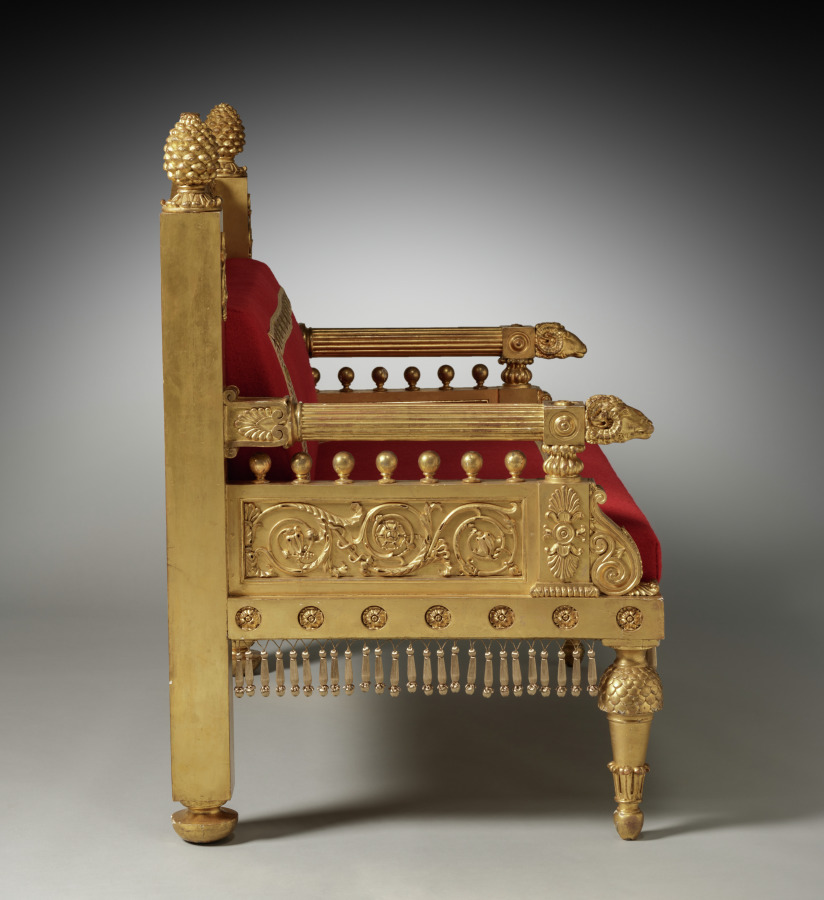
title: Settee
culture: England, 19th century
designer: Thomas Hope (British, 1769–1831)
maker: Unknown Maker (British)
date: c. 1802–07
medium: gilt-wood, reproduction wool upholstery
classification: Wood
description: An art collector, designer, and champion of neoclassicism, Thomas Hope designed this settee for display in his London house. Hope’s design exemplifies the continued interest in neoclassical ornament around 1800 through the use of elaborately carved friezes, a central pediment, and a lavishly gilded surface. In 1807 Hope published Household Furniture and Interior Decoration, featuring descriptions of his renowned collection of antiquities and the interior furnishings from his London house, including this settee. Many architects and cabinetmaking firms took inspiration from Hope’s designs, adapting Greek and Roman forms to create bold expressions of neoclassicism in their architecture and decoration.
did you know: The acorn finials, ram’s heads, and clusters of stylized honeysuckle flowers along the settee’s frame are typical of Thomas Hope’s neoclassical designs.